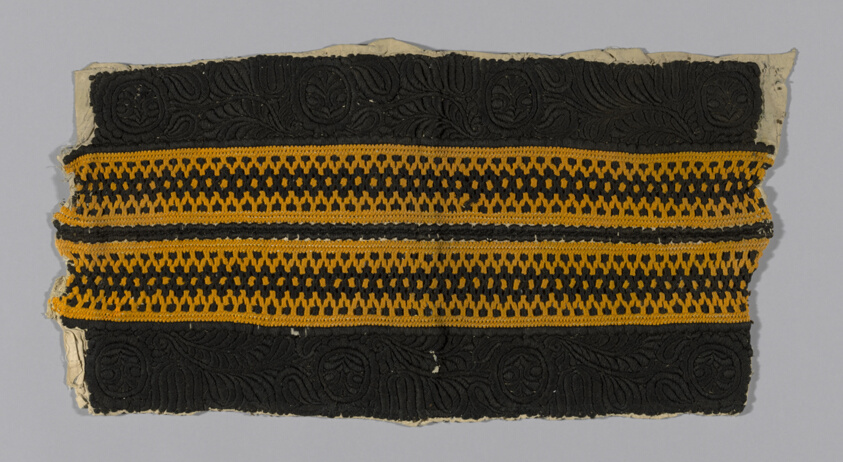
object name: Textile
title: Sleeve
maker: Czech Republic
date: 19th century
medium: Linen, plain weave; embroidered with wool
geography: Czech Republic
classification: textile; needlework (visual works)